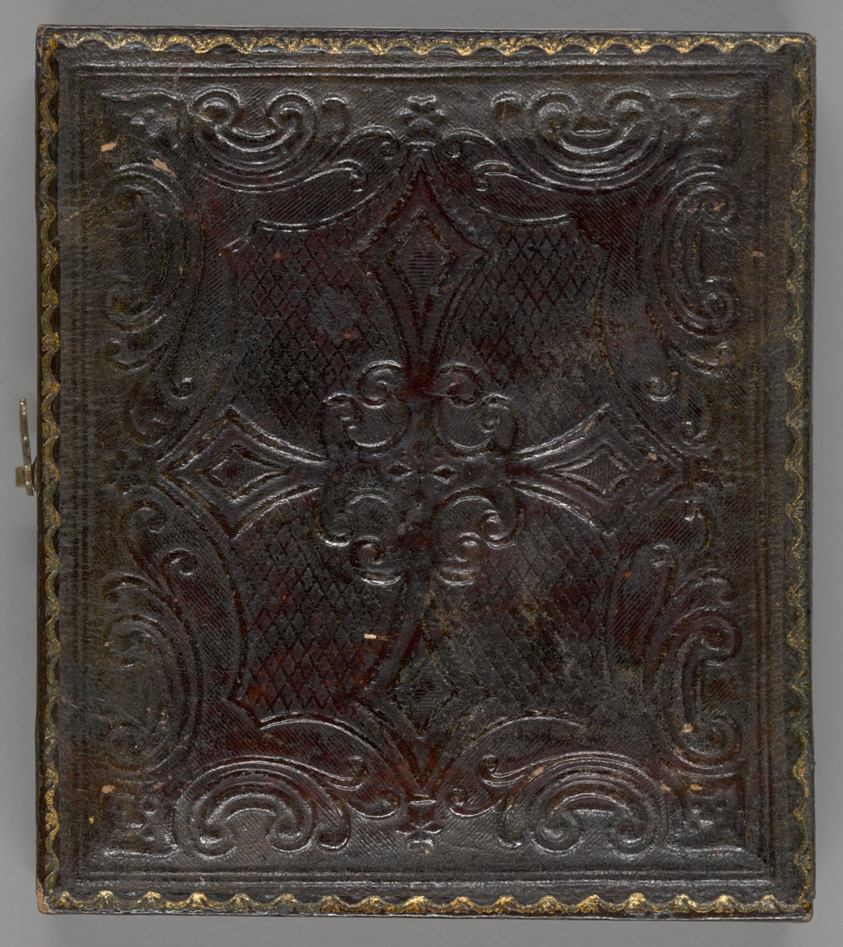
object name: Photograph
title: Untitled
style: 19th century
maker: Artist unknown; American, 19th century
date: 1839/60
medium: Daguerreotype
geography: United States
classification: daguerreotype; photographic process; photography; photograph